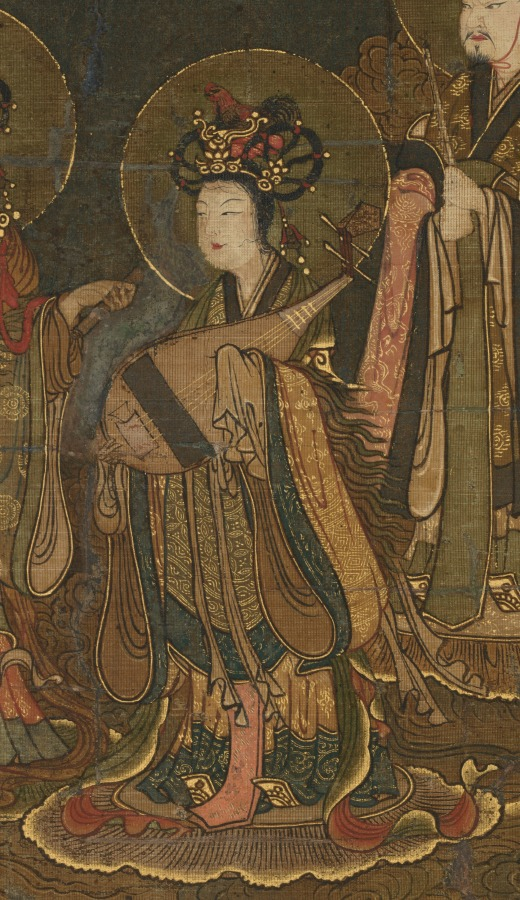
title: Descent of the Nine Luminaries and the Seven Stars at Kasuga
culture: Japan, Nanbokuchō period (1336–92)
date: mid- to late 1300s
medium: Hanging scroll; ink, color, gold and cut gold on silk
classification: Painting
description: This medieval religious painting shows celestial beings descending from the heavens into the Kasuga Shrine, a major religious site in Japan's ancient capital, Nara. The moon and the Kasuga mountain range appear in the uppermost portion of the painting, as does a red shrine entrance gate, or torii. In the upper part of the painting, figural representations of the stars in the constellation known as the Big Dipper in the West descend from right to left on cloud banks. In the lower part, the Nine Luminaries (Sanskrit: Navagraha) that emerged from the Vedic tradition—the sun and moon; the planets Jupiter, Mars, Saturn, Venus, and Mercury; and personifications of the fluctuating lunar nodes—descend in similar fashion. The painting uses the "deities in descent" scheme originating in China, as well as the original Buddhist form mandala (Japanese: honjibutsu mandarazu) format prevalent in medieval Japanese Shinto-Buddhist painting, to generate an image connected to the worship of celestial bodies in Esoteric Buddhism.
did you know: A 19th-century copy of this painting in ink and light color exists at the Kyoto City University of Arts.